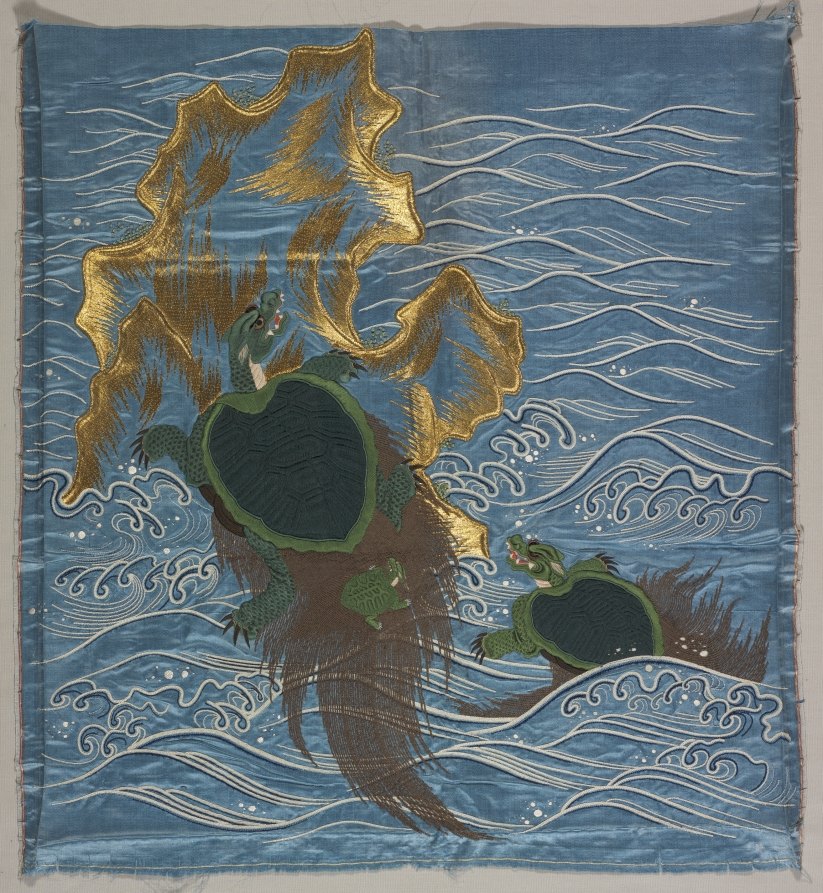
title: Embroidered Fukusa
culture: Japan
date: late 1800s-early 1900s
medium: embroidered silk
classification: Embroidery